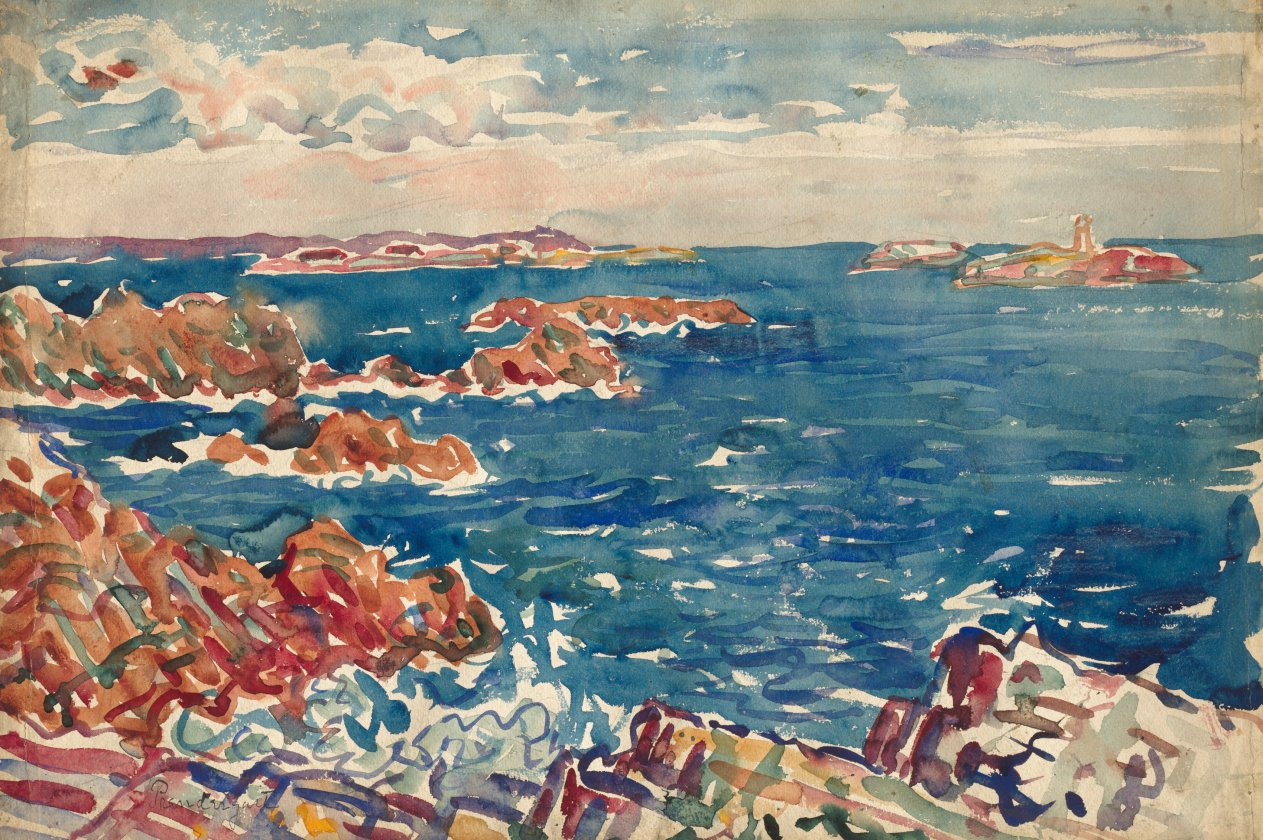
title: The Rocky Seashore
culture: America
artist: Maurice Prendergast (American, born Newfoundland [now Canada], 1858–1924)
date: c. 1907–10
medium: watercolor with traces of graphite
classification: Drawing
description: Throughout Prendergast’s career, the seaside was one of his favorite subjects, but in this watercolor, his true concern was color. Painting rapidly, Prendergast allowed the white of the paper to show around the edges of his jagged strokes of color, suggesting sunlight on wet rocks. This spontaneous seascape identifies him as one of the first American artists to experiment with modernism before the Armory Show in New York City of 1913, the first large-scale exhibition of European modern art held in the United States.